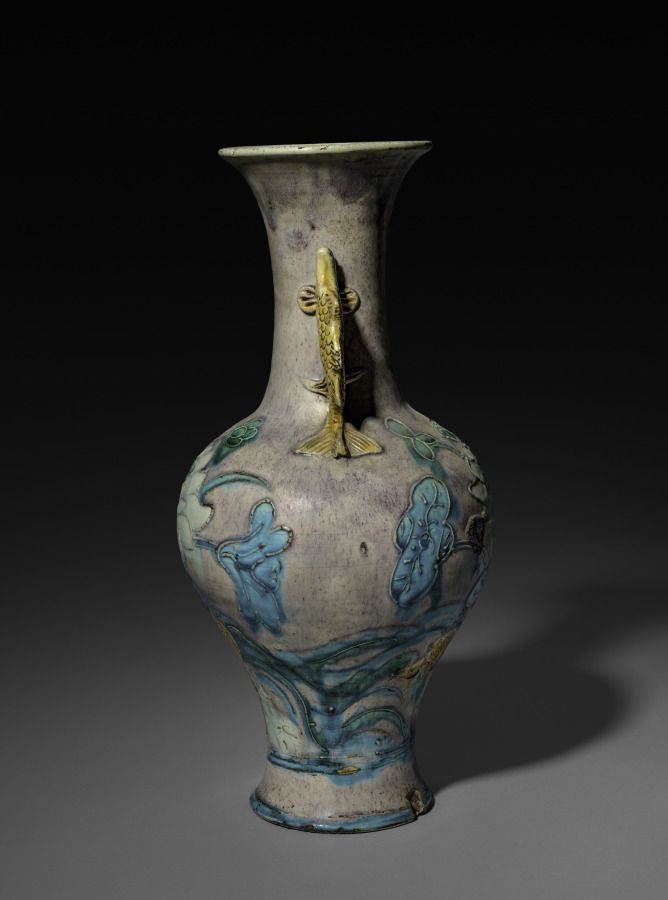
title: Beaker Vase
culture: China, Shanxi province, Ming dynasty (1368-1644)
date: 1368–1644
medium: Porcelain, Fahua ware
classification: Ceramic